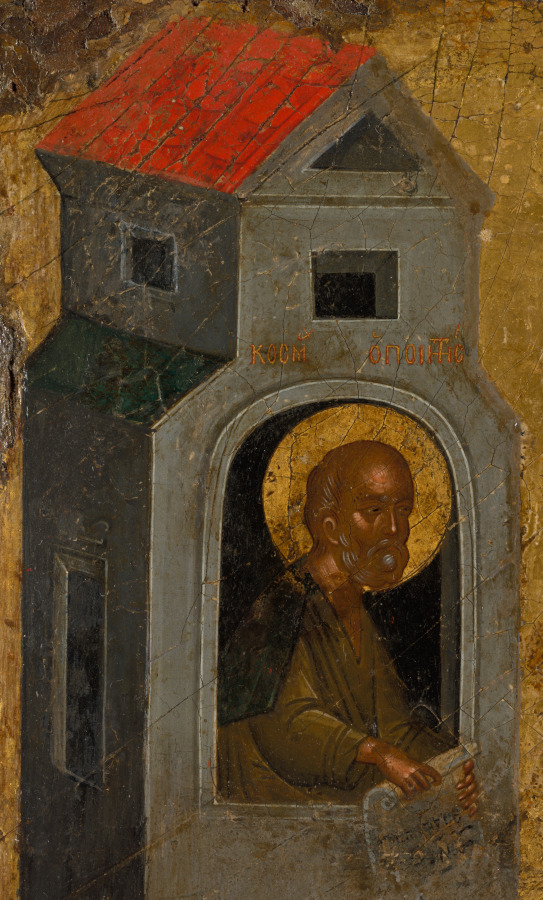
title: Icon of the New Testament Trinity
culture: Byzantium, Constantinople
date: c. 1450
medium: Tempera and gold on wood panel (poplar)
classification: Painting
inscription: Ο ΠΑΛΑΙΟC ΤΗΩ- God the Father as Christ in old age on right identified on either side of his head in gold, outlined in red.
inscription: ΤΟ ΑΙΟΝ ΠΝΑ- The Holy Spirit, identified by dove in gold outlined in red.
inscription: ΙΩCHΦ Ο ΠΟΙΗΤΗC- St. Joseph the Hymnographer identified on the left by gold letters, outlined in red.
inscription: ΚΟCΜ Ο ΠΟΙΗΤΗC- St. Kosmas the Hymnopgrapher identified on the right in gold letters in red outline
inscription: "'together with...you my God' and 'your dominion" in Scroll of Kosmas on the right.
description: This icon depicts an important subject in Orthodox Christian art, the three corresponding figures of the single godhead known as the Holy Trinity. The Trinity is represented here in a composition known as the “New Testament Trinity,” which features Christ and God the Father seated on a bench with a dove representing the Holy Spirit between them. The central field is occupied by a large wooden throne with gold highlights on which Christ (left) and the Ancient of the Days (God the Father as Christ in old age) are seated. The Holy Spirit, in the form of a dove, hovers within an eight-pointed star that signifies the eighth day, the future eon. On either side of the Trinity are two hymnographers, authors of hymns of praise, both identified by gold letters outlined in red—Saint Kosmas (about 675–752) on the left and Saint Joseph (about 812/818–about 886) on the right. They both suspend scrolls from round-arched windows. The icon likely was part of a church templon, the barrier that separated the nave from the sanctuary in an Orthodox church. It is not signed or dated; however, careful analysis of the painting’s style and technique places it in Constantinople around 1450, just prior to the city’s fall to the Ottomans in 1453. It represents a moment when Byzantine painting reached a brilliant crescendo.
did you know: More than just a breakfast food, eggs are used to make the tempera paint used in this painting.